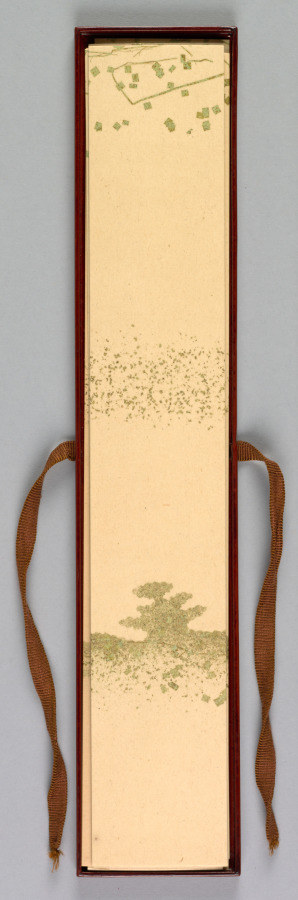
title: Poem Card Box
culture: Japan, Meiji period (1868–1912)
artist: Kamisaka Sekka (Japanese, 1866–1942)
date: 1868–1912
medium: wood with lacquer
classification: Lacquer